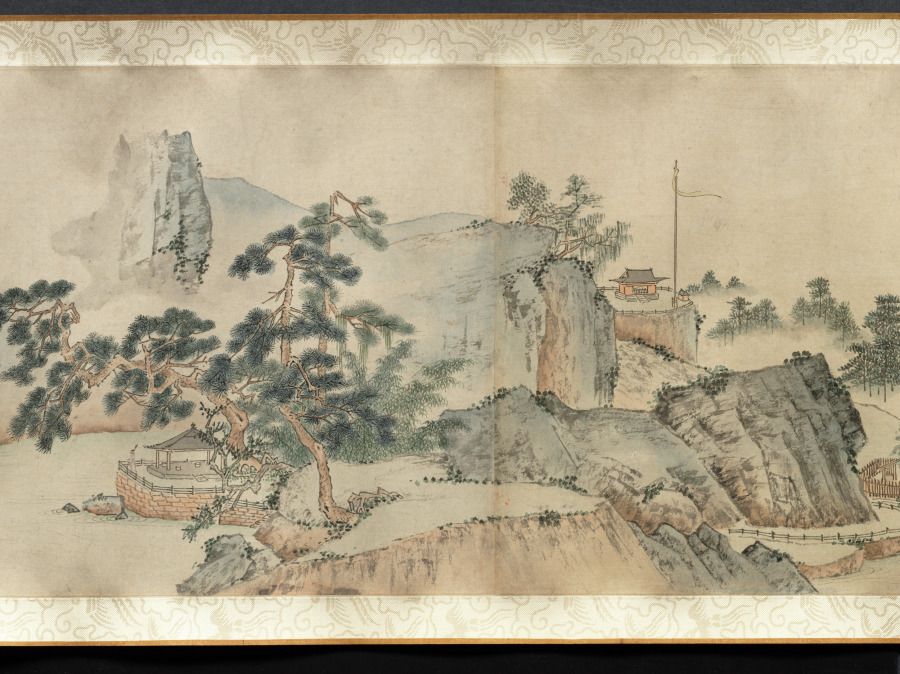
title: Ten Thousand Li of the Yangzi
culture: China, Ming dynasty (1368–1644)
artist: Dai Jin (Chinese, 1388–1462)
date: c. 1400s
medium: Handscroll; ink and color on paper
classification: Painting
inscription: Two colophons at end. Artist's seals: Dai Jin 戴進 and Wenjin 文進.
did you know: Dai Jin is traditionally considered the founder of the Zhe School, a style of landscape painting.